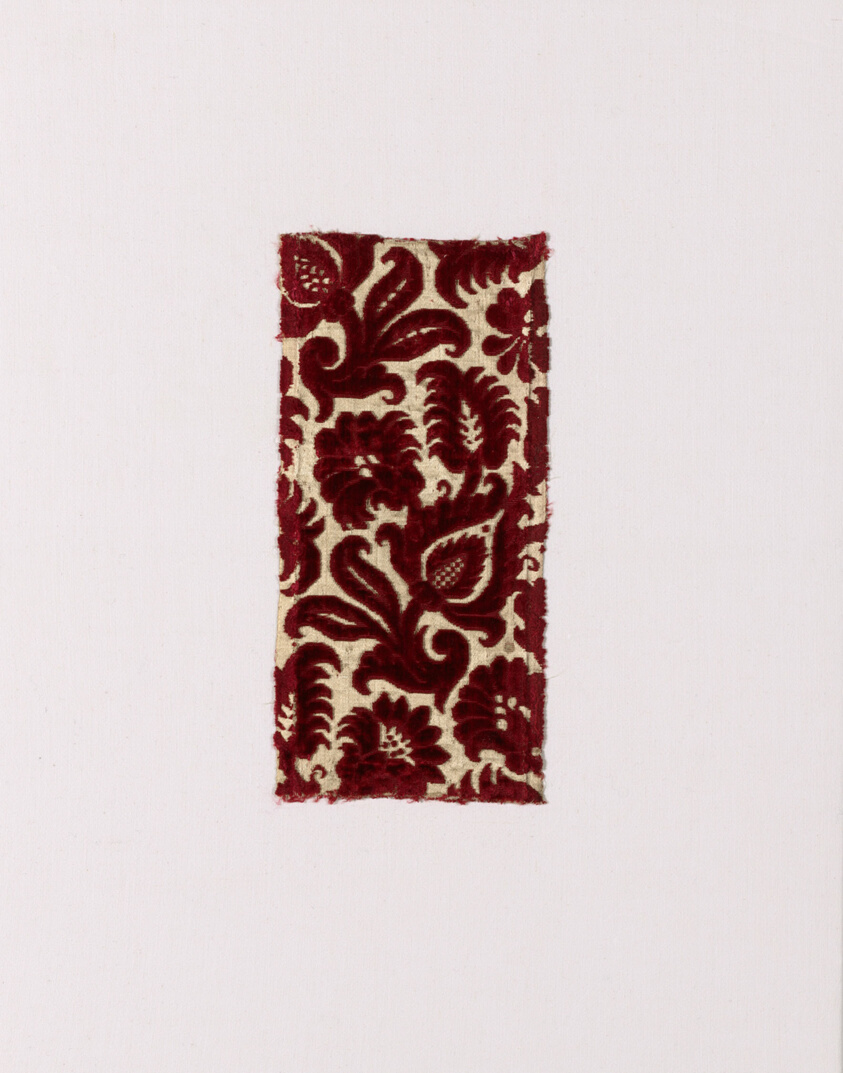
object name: Textile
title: Fragment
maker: Italy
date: early 17th century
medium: Silk, warp-float faced 7:1 satin weave with supplementary pile warps forming cut and uncut voided velvet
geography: Italy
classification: textile; weaving - velvet